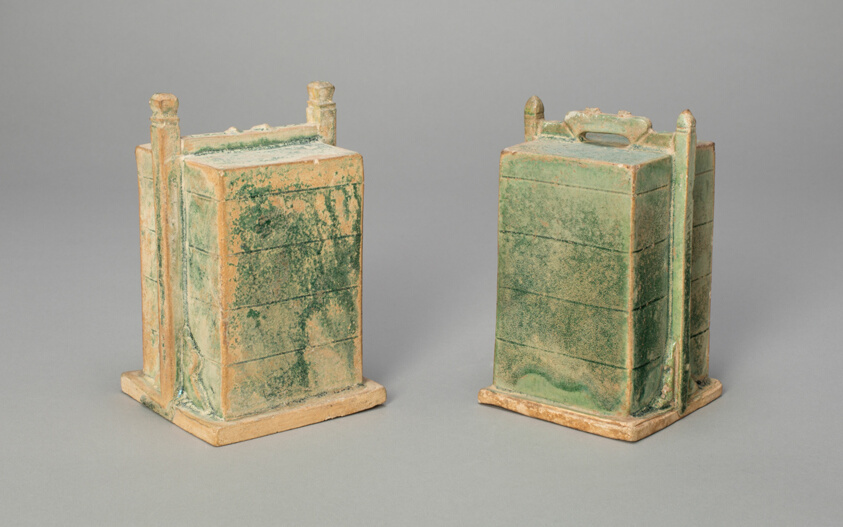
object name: Sculpture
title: Miniature Stacked Boxes Simulating Food Containers (Mingqi)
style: Chinese (culture or style)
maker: China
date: Ming dynasty (1368–1644)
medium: Earthenware with green glaze and underglaze molded and incised decoration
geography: China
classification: ceramics; asian art; sculpture